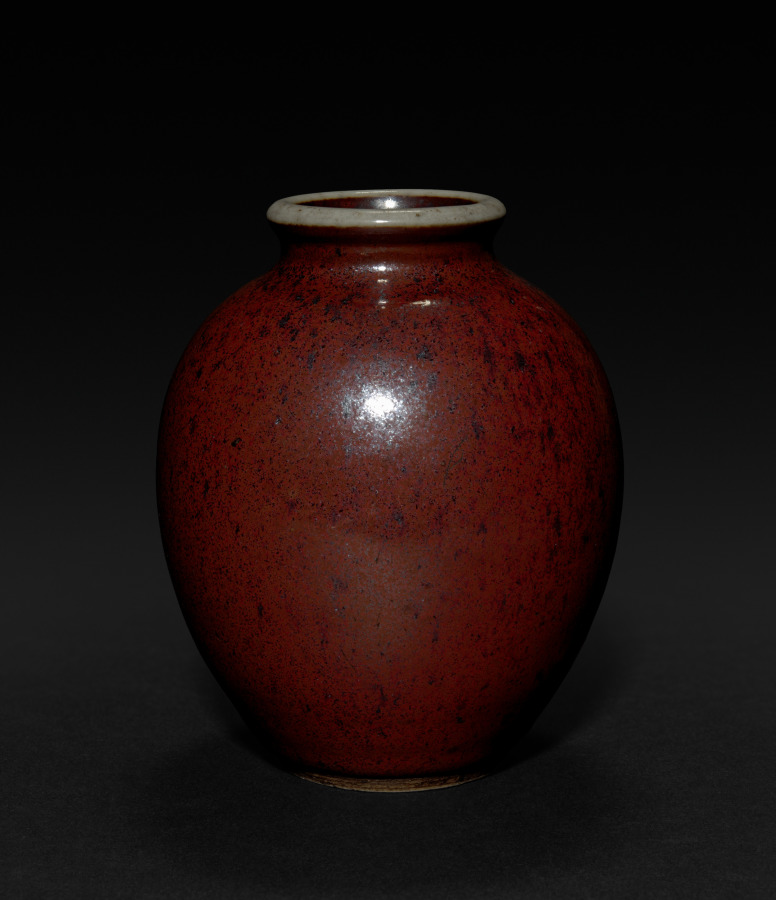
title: Jar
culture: China, Qing dynasty (1644–1911), Qianlong reign (1736–95)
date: 1736–95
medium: porcelain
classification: Ceramic